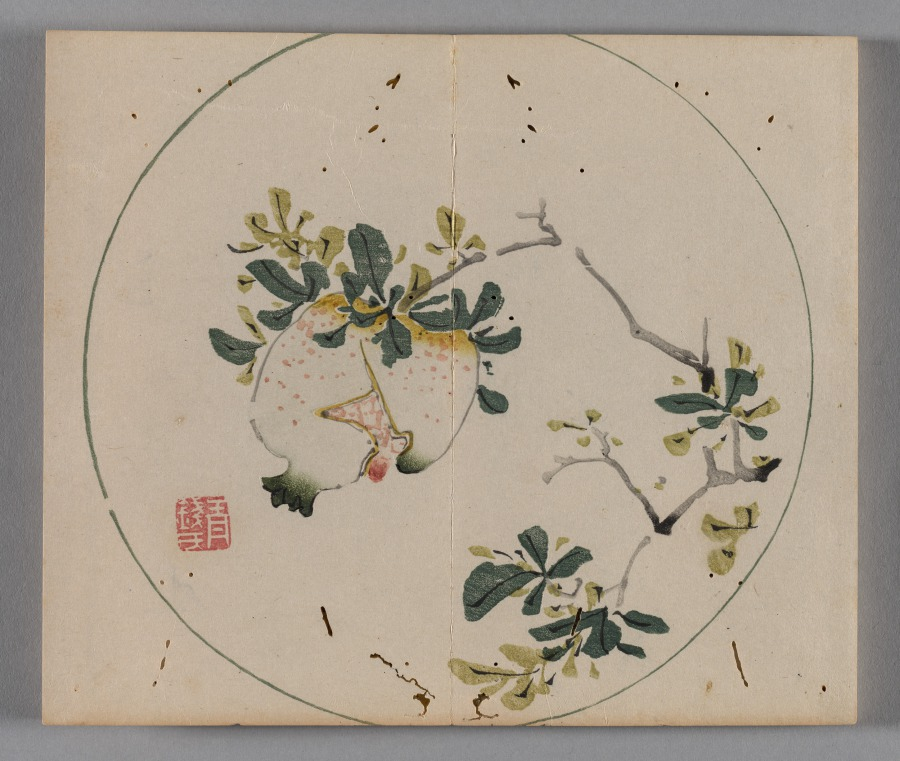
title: Ten Bamboo Studio Collection of Calligraphy and Painting: Round Fans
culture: China, Qing dynasty (1644-1911)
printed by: Hu Zhengyan (Chinese, c. 1584–1674)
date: 1633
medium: Woodblock-printed book; ink and colors on paper; first edition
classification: Print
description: Color printing reached a level of perfection in the early 1600s, as seen in this Ten Bamboo Studio Collection of Calligraphy and Painting and the Mustard Seed Garden Manual of Painting (printed 1679 and 1701). The painterly quality, precision in registering (aligning) the woodblocks, and harmonious colors made them the most successful color print editions in Chinese history. Both editions were printed and compiled in Nanjing, spread nationwide, and had a great impact on the arts in Japan and Korea.